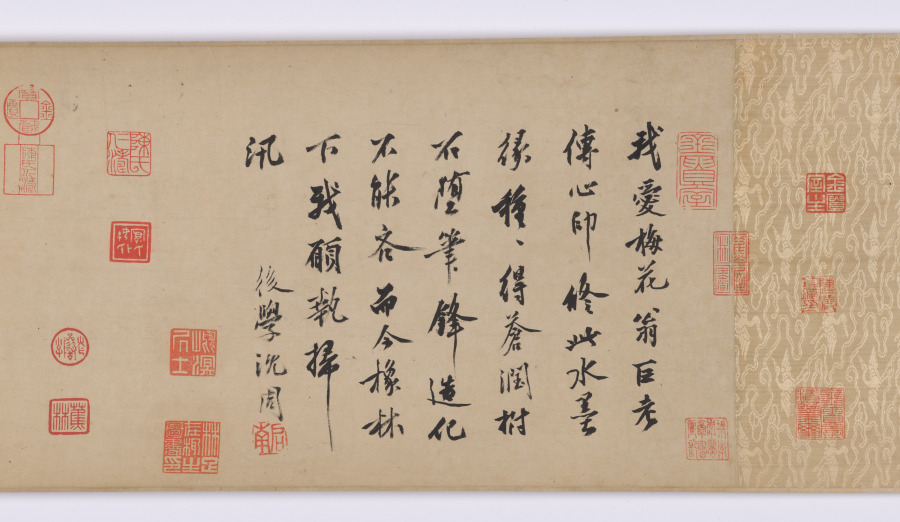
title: Poetic Feeling in a Thatched Pavilion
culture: China, Yuan dynasty (1271-1368)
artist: Wu Zhen (Chinese, 1280–1354)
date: 1347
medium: handscroll; ink on paper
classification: Painting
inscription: 依村構草亭，端方意匠宏。 林深禽鳥樂，塵遠竹松輕。 泉石俱延賞，琴書悅性情。 何當謝凡近，任適慰平生。 至正七年丁亥冬十月，為元澤戲作草亭詩意。梅沙彌書 [印]楳華盦; 嘉興吳鎮仲圭書畫記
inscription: 我愛梅花翁，巨老傳心印。 脩此水墨缘，種種得蒼潤。 樹石墮筆鋒，造化不能吝。 而今橡林下，我願執掃汛。 後學沈周 [印]启南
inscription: Colophon by Chen Rentao (1952): 予求梅道人畫二十年不可得。所見多膺鼎，即故宮所藏山水數軸都不可靠。傳世真迹，惟《漁父圖》、《嘉禾八景》與此《草亭詩意》而已。壬辰十月十四日余大病初愈，居家休養，研山師忽持此圖相贈。展卷披覽，頓覺精神沛振，如服僊藥。同日又得宋拓柳公權《神策軍紀聖德碑》，及群玉堂藏《真草書千(字)文》，皆海內孤本。一日得數寶，欣喜何如，書以志幸。 陳仁濤識 [印]陳氏仁濤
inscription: Colophon by Chen Rentao: 此圖作於至正七年丁亥，時年六十八，盖其晚年神品也。 濤又識 [印]陳仁濤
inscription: Title on frontispiece by Li Dongyang 李東陽 (1447-1516).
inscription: 33 additional seals: 1 seal of Li Chao-heng 李肇亨 (1592-1664)：檇李李肇亨書畫記; 9 seals of Liang Qingbiao 梁清標 (1620-1691): 蒼巖子、蕉林、蕉林梁氏書畫之印、蕉林秘玩、蕉林書屋、蕉林玉立氏圖書、棠邨 (appears twice)、棠邨審定; 1 seal of Wang Yirong (1845-1900): 懿榮; 3 seal of Li Yanshan (1898-1961): 雙銕笛樓 (appears twice)、硯山心賞; 12 seals of Chen Rentao 陳仁濤（1906-1968）：陳氏仁濤、陳仁濤珍藏印、金匱寶藏·陳氏仁濤 (appears three times)、金匱秘笈、金匱室、金匱室精鑒璽 (appears twice)、金匱室主、金匱神品、仁濤奇緣; 1 seal: 崐溟居士; 1 seal: 林止在㭯生圖書印; 3 seals unidentified.